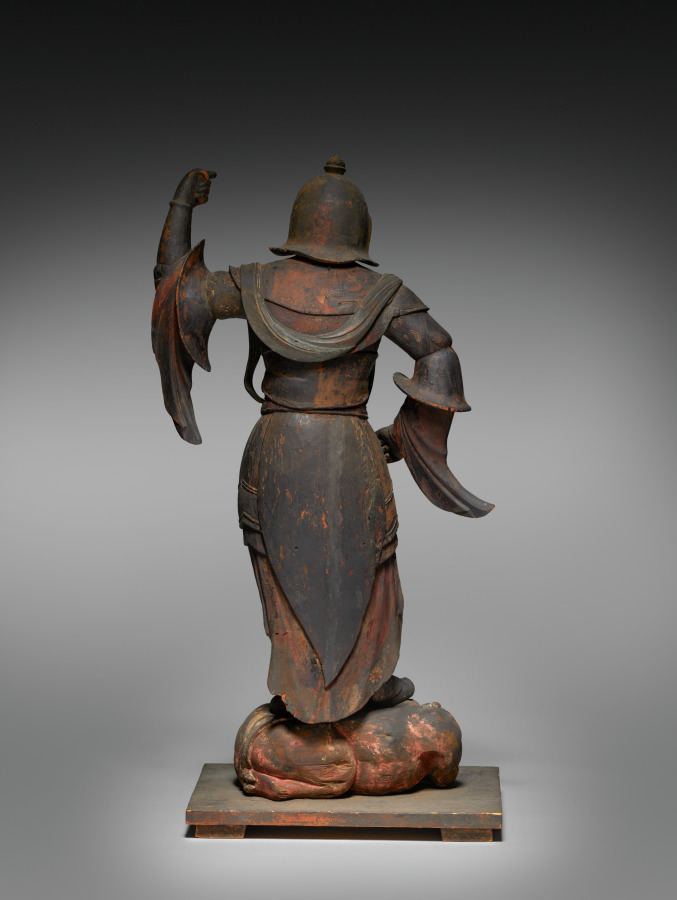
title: Guardian Figure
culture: Japan, Heian period (794–1185)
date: 1000s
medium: wood with polychromy and kirikane (cut-gold)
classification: Sculpture